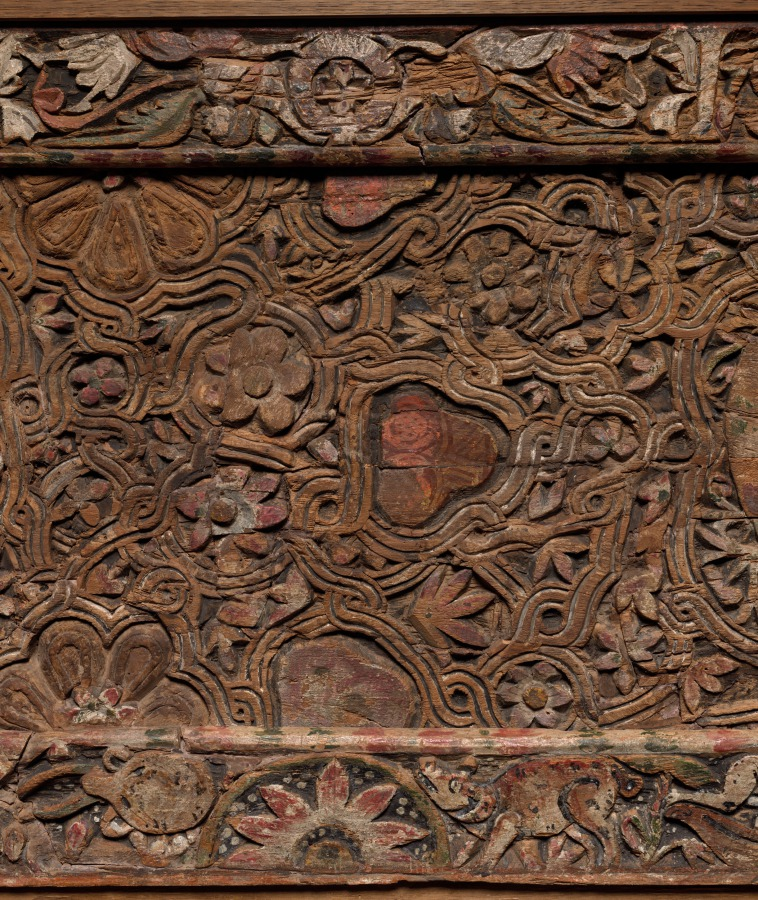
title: Ornamental Panel (from a Ceiling?)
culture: Egypt, Coptic period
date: 500s (frame) and 700s (central panel)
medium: wood with paint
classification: Furniture and woodwork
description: This wooden panel and its frame come from different locations. The four narrow panels forming the outer frame are stylistically datable to the 500s. The large central rectangular panel might date to the 700s. It is most likely a carved ceiling, but its architectural context is unknown. Both panel and frame have been cut down and joined together at some point in their history under unknown circumstances. The decorative program of the main panel features two large rosettes surrounded by florets, leaves, and fruit. The outer frame features two flying angels holding a wreath, a peacock, an octopus, a seated fisherman who holds a long line with a fish attached, and a swimming boy with a dolphin. The vocabulary of the frame is dominated by water life, particularly of the Nile and its banks. Though separated from its original place and altered, this important object provides a welcome glimpse of an architectural interior from early Christian Egypt.